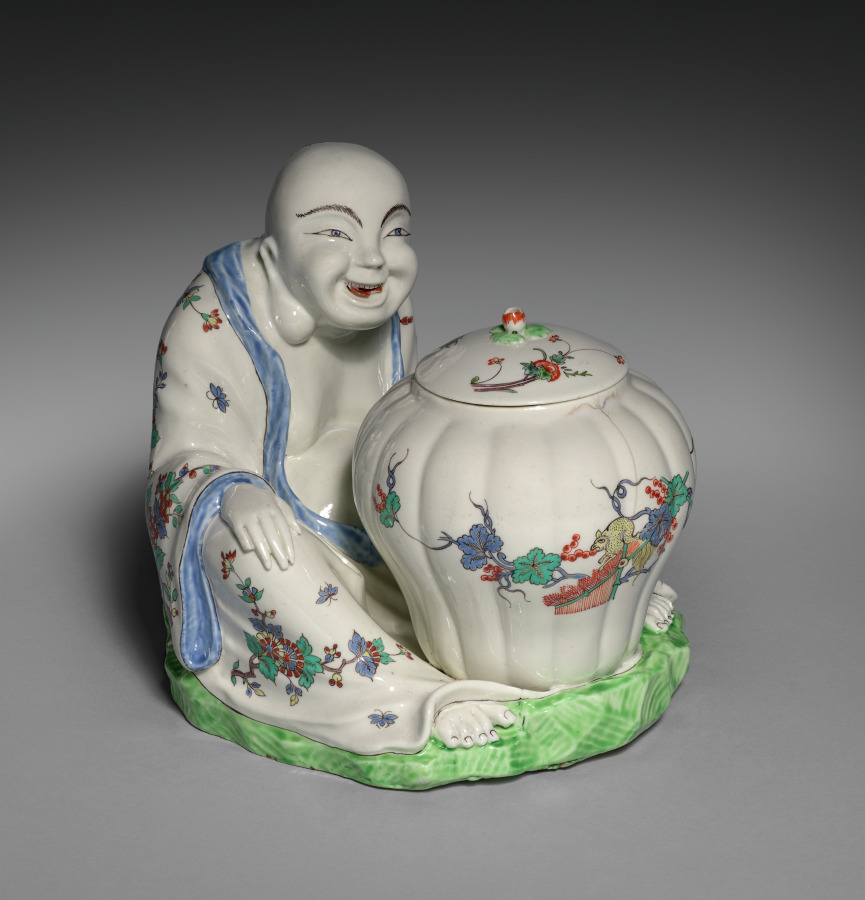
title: Figure of Budai or Hotei with Jar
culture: France, Chantilly, 18th century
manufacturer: Chantilly Porcelain Factory (French)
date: c. 1735–40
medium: Tin-glazed soft-paste porcelain with enamel decoration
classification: Ceramic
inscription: [Mark of the Chantilly factory (red hunting horn), on bottom]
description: The production of decorative figures like this one, referred to as magots or pagodes in European texts, was the result of an 18th-century European interest in Chinese and Japanese culture and porcelain. Budai, pronounced Hotei in Japanese, was a semilegendary Chinese monk known in Japan through the transmission of Chan Bhuddism. This figure’s decoration with multicolor overglaze enamels on a milky-white is typical of Japanese Kakiemon style.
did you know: In 1735, the Chantilly factory was given a 25-year royal privilege for the manufacture of objects that imitated Japanese porcelain.